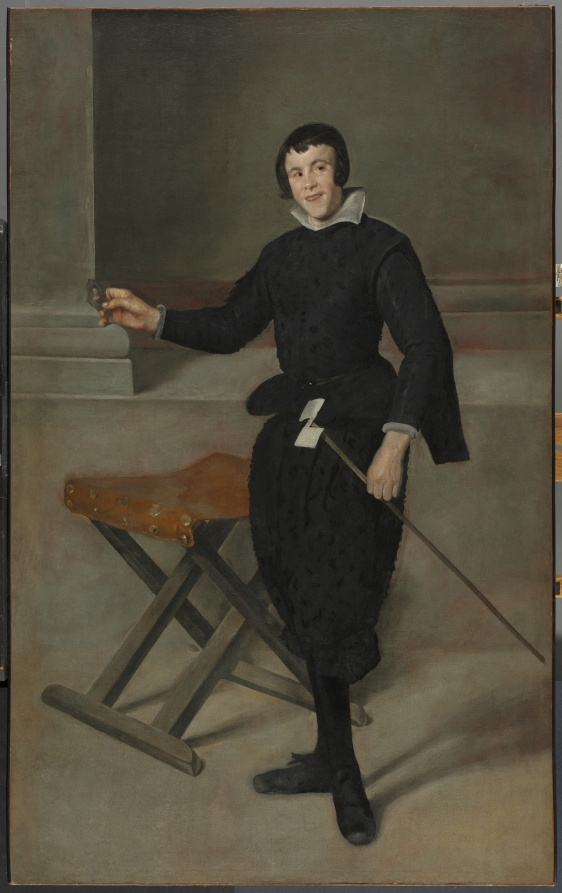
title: Portrait of the Jester Calabazas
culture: Spain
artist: Diego Velázquez (Spanish, 1599–1660)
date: c. 1631–32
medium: oil on canvas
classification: Painting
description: Calabazas, a jester in the court of King Philip IV of Spain, had physical and mental disabilities, a state that the artist emphasizes, rather than tries to hide. While the Spanish court prized and doted upon people with disabilities such as Calabazas, Velázquez transformed their depiction in portraiture. This startling work uses the format of the formal, full-length court portrait to present a type of person who was generally perceived as marginal at this point in history and profoundly humanizes him.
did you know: Calabazas holds a wind-driven pinwheel and a miniature portrait of a woman, together suggesting the inconstancy of love.